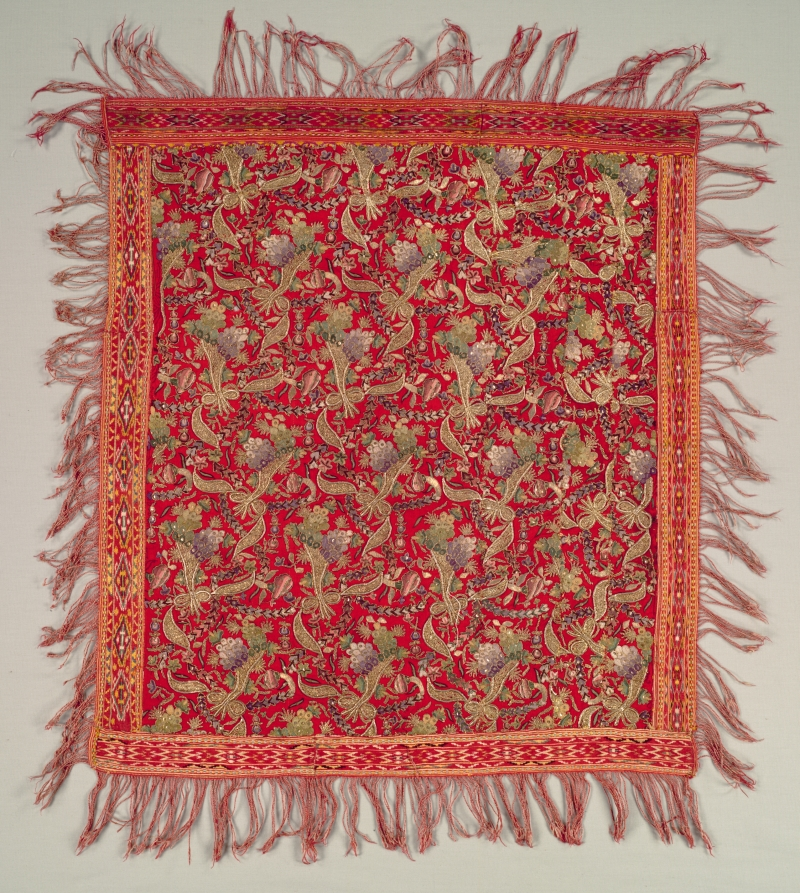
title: Embroidered Square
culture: Turkey, 18th-19th century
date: 18th-19th century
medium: embroidery: silk and metallic thread on wool ground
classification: Embroidery